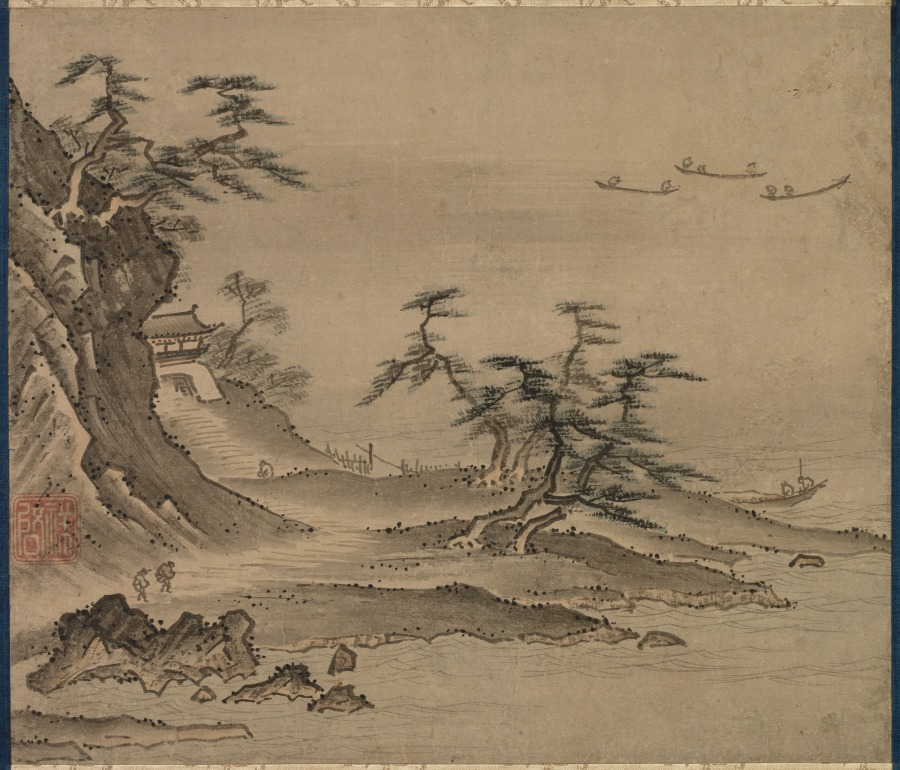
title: View of Xiao Xiang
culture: Japan, Muromachi period (1392–1573)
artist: Kenkō Shōkei (Japanese, active 1478–1506)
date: c. 1478–1506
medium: album leaf; ink and light color on paper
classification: Painting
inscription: 祥啓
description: This scene illustrates the famous theme of Eight Views of the Xiao-Xiang River. This subject is also depicted in other paintings in our collection. This particular scene is known as "Returning Sail off Distant Shore."